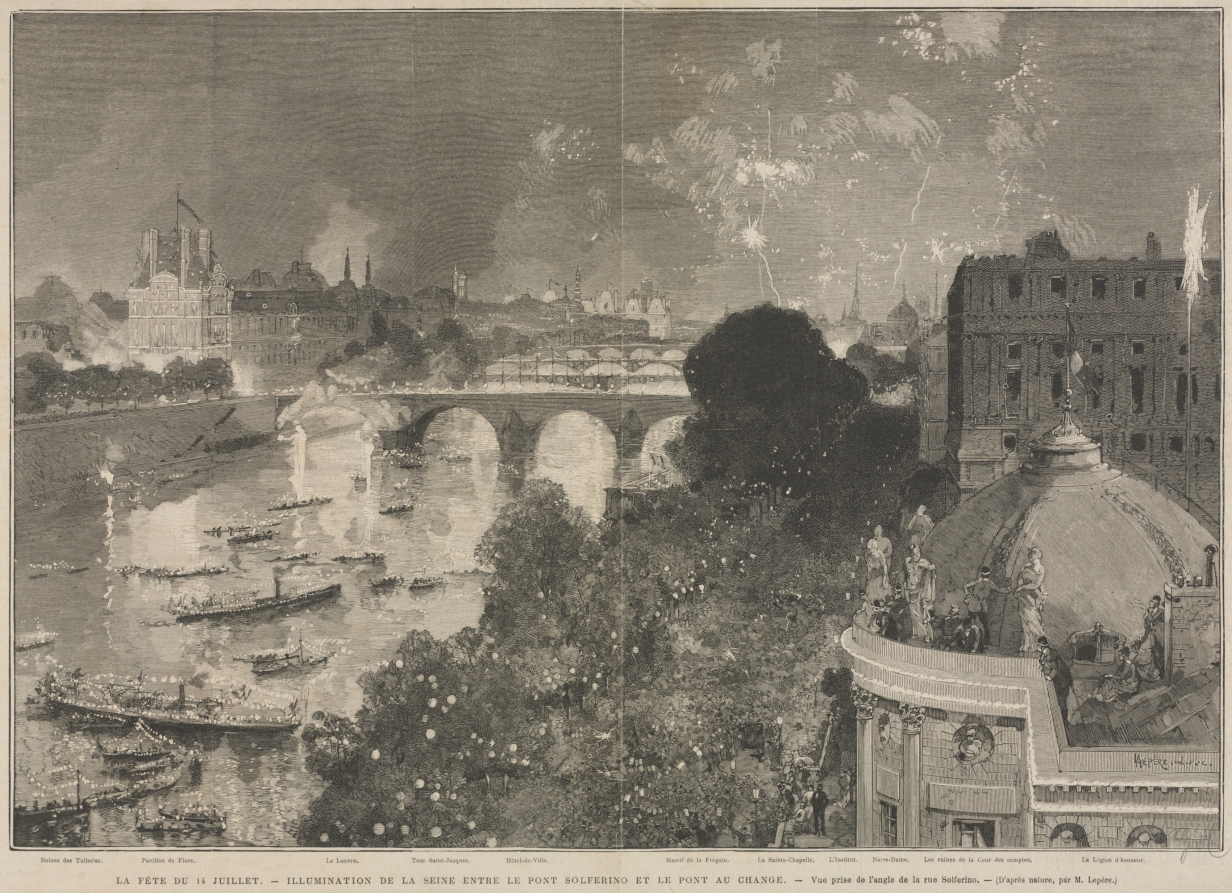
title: The Festival of 14 July, Illumination of the Place of the Republic (after H. Scott)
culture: France, 19th century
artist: Auguste Louis Lepère (French, 1849–1918)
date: 1880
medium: wood engraving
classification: Print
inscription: signed in pencil, lower right margin: A. L. (?)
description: An abundance of lanterns and fireworks light the night sky in this Parisian scene. Revelers scramble atop roofs, balconies, bridges, and ships to join in the celebration of a warm Bastille Day, which honors the birth of the French Republic. The French constitution allows its President to pardon crimes on this day, a tradition that continues today.